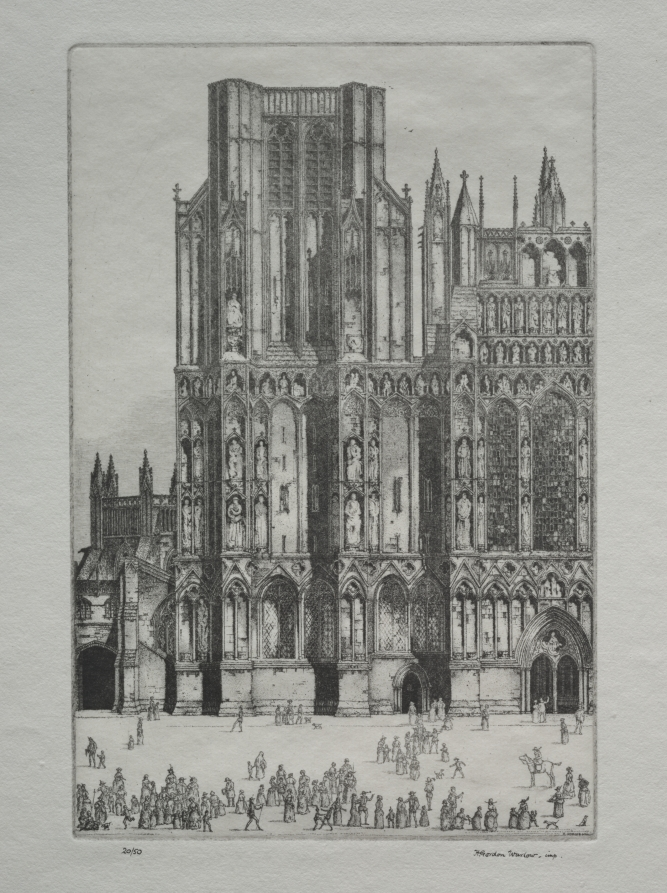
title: Wells Cathedral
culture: England, 20th century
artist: Herbert Gordon Warlow (British, 1885–1942)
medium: drypoint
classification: Print